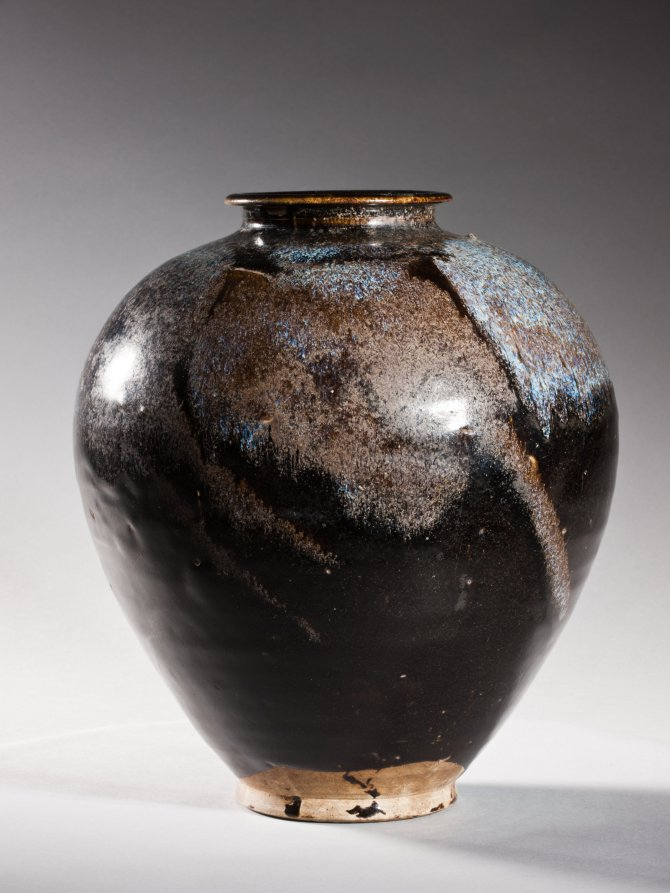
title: Jar: Black Ware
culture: China, Henan province, Huangdao kilns, Tang dynasty (618-907)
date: 700s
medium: glazed stoneware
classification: Ceramic